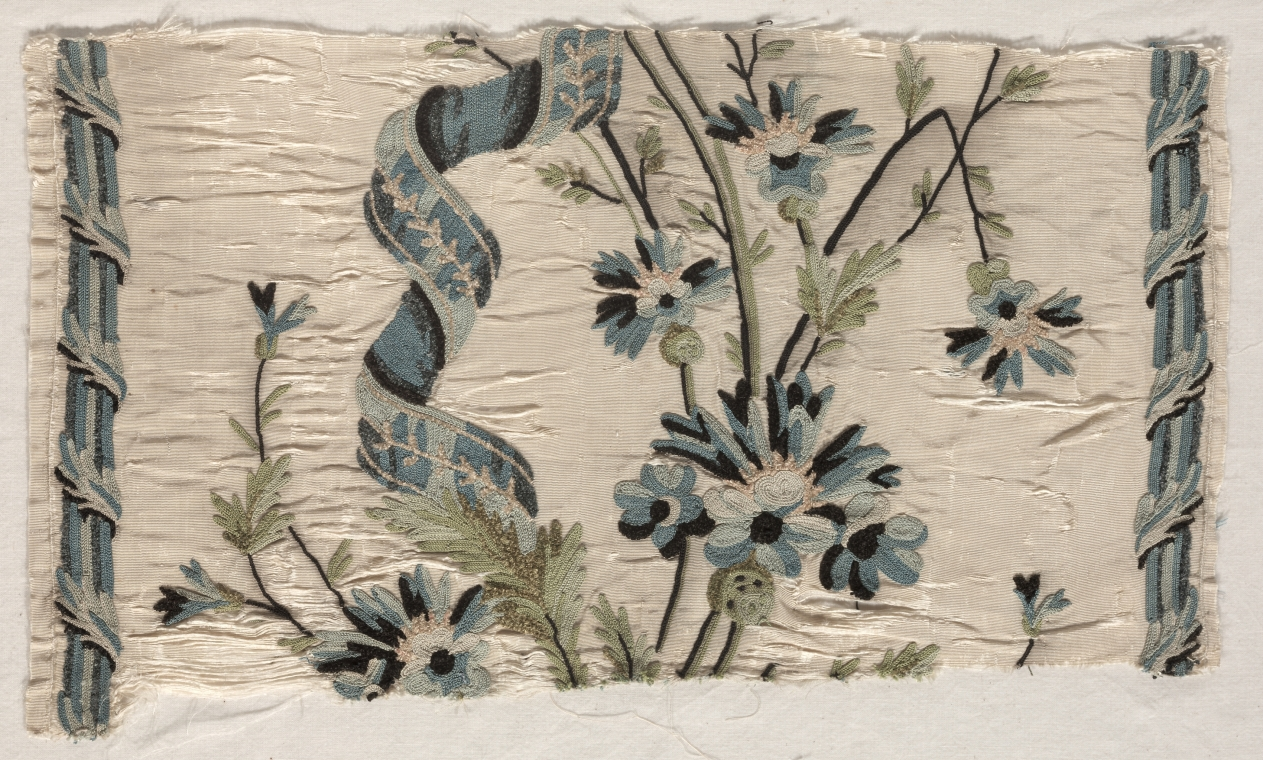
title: Two Pieces of Embroidery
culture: France, 18th century, Period of Louis XV (1723-1774)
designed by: Philippe de Lasalle (French, 1723–1805)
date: 1723–1774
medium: embroidery, silk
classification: Embroidery